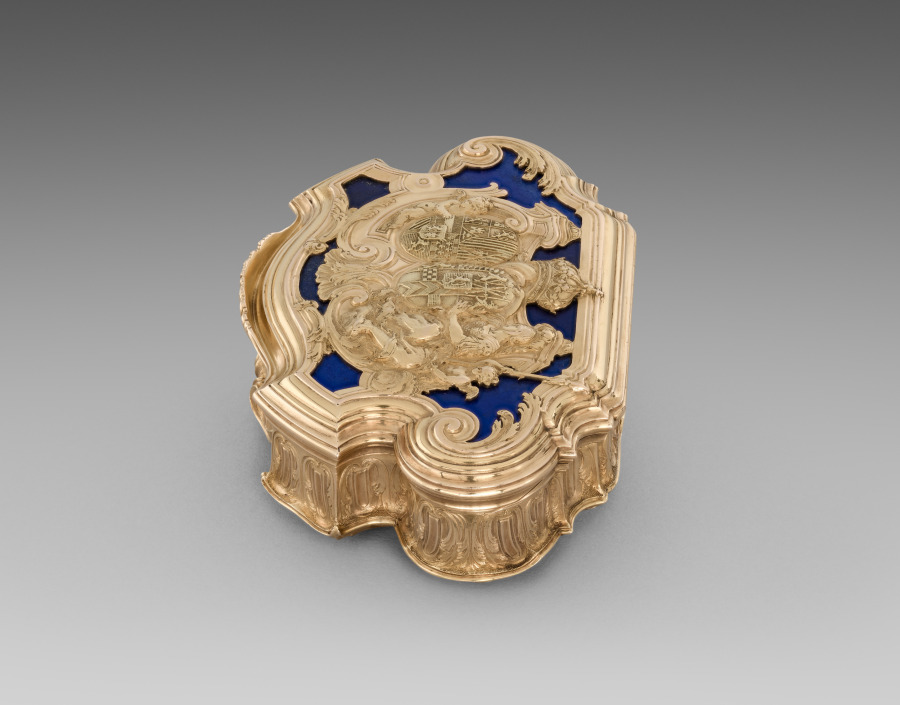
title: Gold Box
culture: France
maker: Juste-Aurèle Meissonnier (French, 1695–1750)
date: 1728–29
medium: gold and lapis lazuli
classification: Metalwork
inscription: IOM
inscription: a crowned M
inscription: a crowned dolphin's head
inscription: a crowned chancellor's mace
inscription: double frame eagle's head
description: With its central cartouche, heavy molding, and fluted sides, the design of this box attests to Juste-Aurèle Meissonnier’s interest in architecture. The box is further distinguished by a strong sense of movement, achieved through its dynamic contour, extraordinary level of detail, and the dramatic contrast between gold and lapis lazuli. Such small boxes, known as snuffboxes, were used to hold scented powdered tobacco that was inhaled through the nostrils. Made of precious materials and highly ornamented, they conveyed the owner’s wealth, fashion awareness, sophistication, and social standing. These personal, collectible items were often presented as luxurious gifts. This box was made for the dowager Queen of Spain, Maria Anna of Neuburg, whose coat of arms – along with that of her late husband, Charles II – features on the cover.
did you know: This is one of the two known objects that bear the maker's mark of Meissonnier.